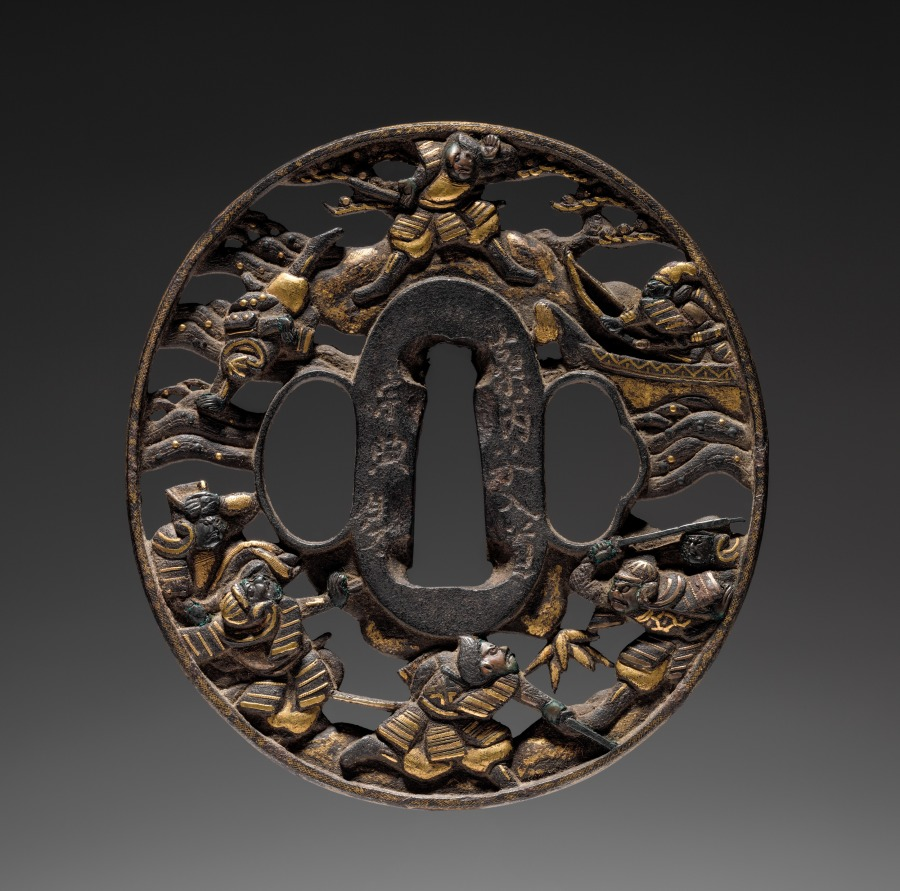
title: Sword Guard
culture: Japan, Edo period (1615–1868)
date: mid-1600s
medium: iron (Soten type)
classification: Arms and Armor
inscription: signed "Soheishi-nyudo Soten."